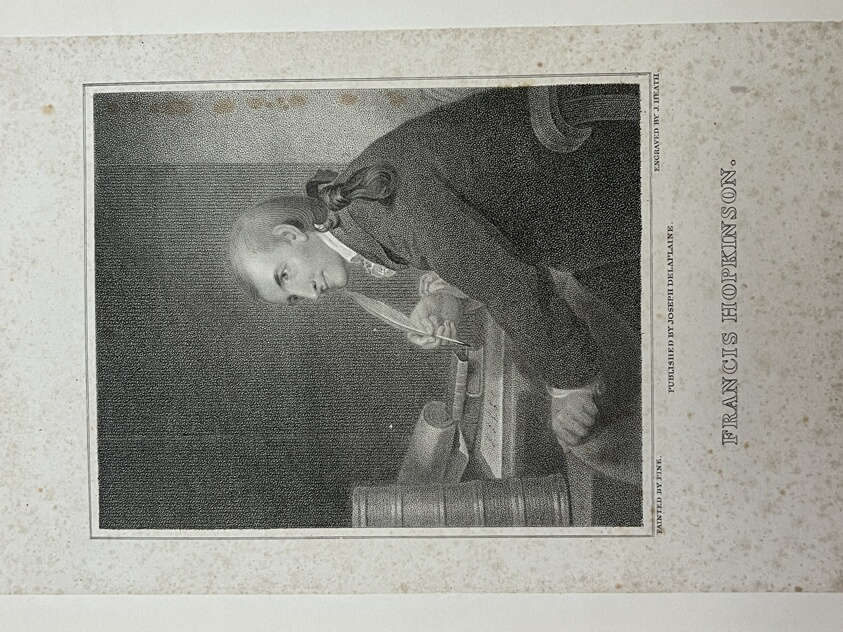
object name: Print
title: Francis Hopkinson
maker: James Heath (English, 1757-1834); after Robert Edge Pine (British, 1742-1788); published by Joseph Delaplaine (American, 1777-1824)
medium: Stipple etching on paper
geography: United States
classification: reproduction; print; prints and drawing